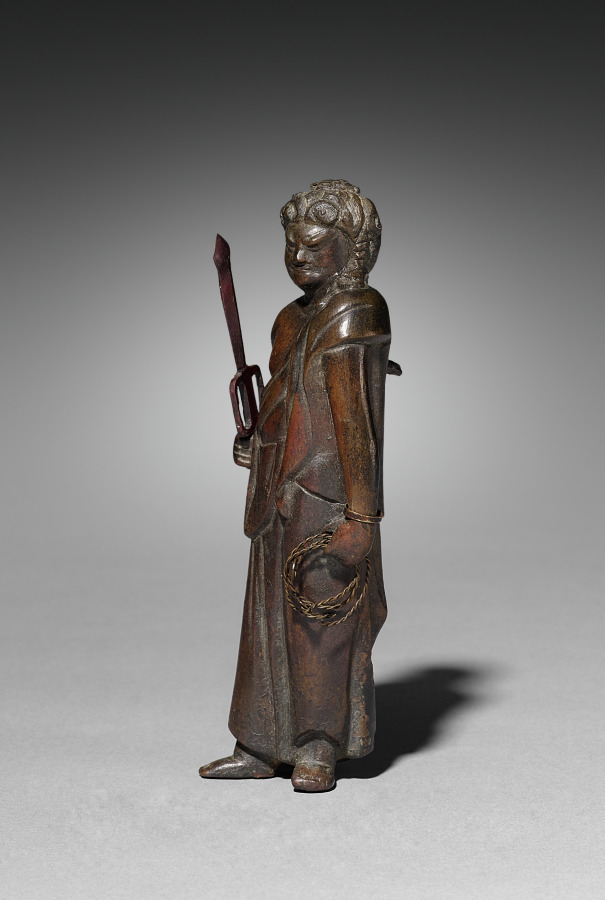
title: Fudō Myōō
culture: Japan, Kamakura period (1185–1333)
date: early 1300s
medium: bronze with wire attachments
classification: Sculpture